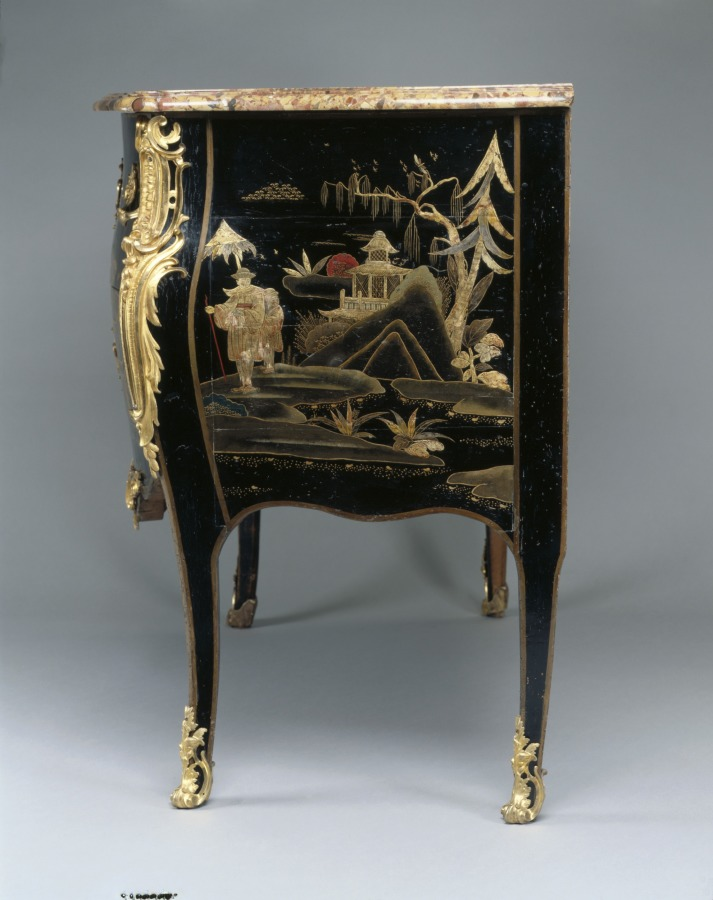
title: Chest of Drawers (Commode)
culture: France, 18th century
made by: probably by Adrien Faizelot Delorme (French)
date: c. 1750– 1765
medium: oak, black lacquer with raised chinoiserie decoration, gilt metal mounts, marble top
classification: Furniture and woodwork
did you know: Although this chest of drawers was made in France, its decoration is an imitation of Chinese lacquer, which reflects European perceptions of East Asia at the time.